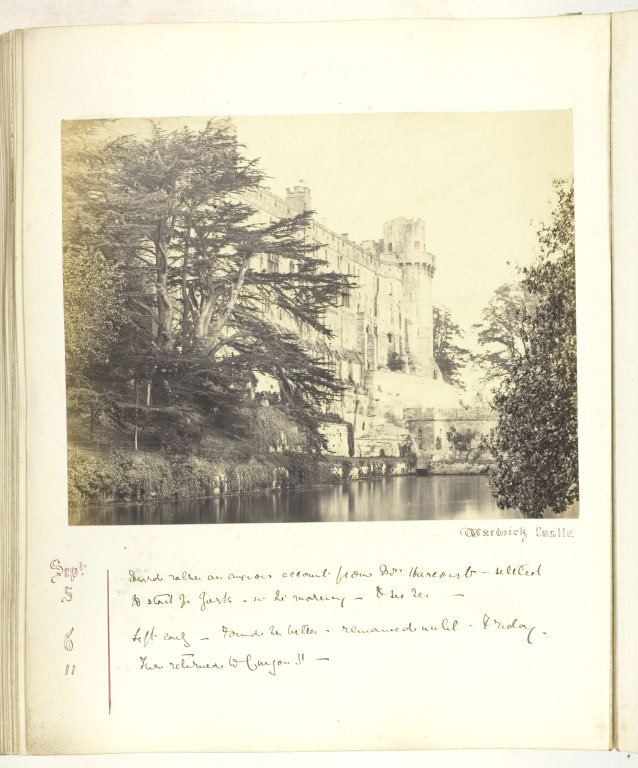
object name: Photograph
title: Untitled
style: 19th century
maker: Georgina Cowper, attributed; English, mid 19th century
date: 1868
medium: Albumen print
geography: England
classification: photograph; albumen silver print; photography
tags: Collected by Hugh Edwards, Untitled Album 1849-60, Auld Lang Syne